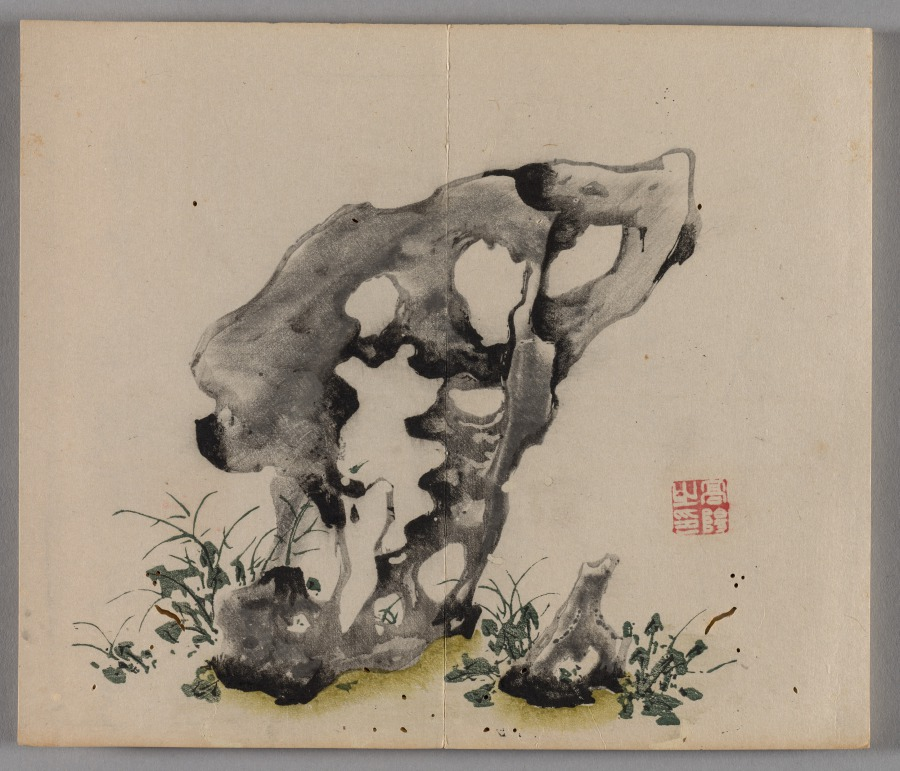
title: Ten Bamboo Studio Painting and Calligraphy Handbook (Shizhuzhai shuhua pu): Rocks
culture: China, Qing dynasty (1644-1911)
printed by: Hu Zhengyan (Chinese, c. 1584–1674)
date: 1633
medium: Woodblock-printed book; ink and colors on paper; first edition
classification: Print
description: Color printing reached a level of perfection in the early 1600s, as seen in this Ten Bamboo Studio Collection of Calligraphy and Painting and the Mustard Seed Garden Manual of Painting (printed 1679 and 1701). The painterly quality, precision in registering (aligning) the woodblocks, and harmonious colors made them the most successful color print editions in Chinese history. Both editions were printed and compiled in Nanjing, spread nationwide, and had a great impact on the arts in Japan and Korea.